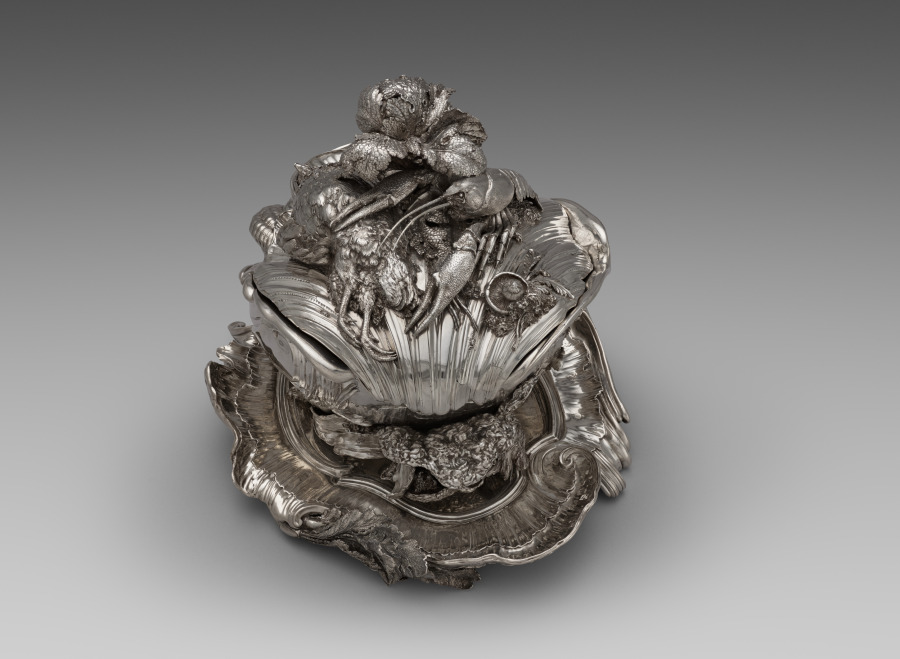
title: Covered Tureen on Stand (Pot-à-oille)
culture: France, Paris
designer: Juste-Aurèle Meissonnier (French, 1695–1750)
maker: Pierre-François Bonnestrenne (French)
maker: Henry Adnet (French, 1745)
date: 1735–38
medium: silver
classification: Silver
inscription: [Maker’s mark of Pierre−François Bonnestrenne, beneath platter; inside tureen (two marks)]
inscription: [Warden's mark for Paris, 1734−1735, beneath platter; inside tureen; inside cover]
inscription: [Charge mark of Hubert Louvet, Paris, 1732-1738, on platter border; beneath platter; beneath tureen; inside cover; inside tureen (two marks)]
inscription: [Discharge mark of Louis Robin mostly used for stamping small work, Paris 1738−1744, on platter border; beneath tureen]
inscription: [Warden's mark for Paris, 1736−1737, on platter border]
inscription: [Possibly British import mark, London, 1925, on platter border]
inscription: [Possibly mark of the British firm Charles & Richard Comyns, on platter border]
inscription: [Discharge of Louis Robin mostly used for stamping gold and silver between 1738 and 1744, beneath tureen; outside cover]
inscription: [Maker’s mark of Henry-Guillaume Adnet, inside cover]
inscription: [Two small undefined marks, inside cover]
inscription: [Under the surface of the platter the engraved signature]: “FAIT-PAR-I-A-MEISSONIER-ARCHITECTTE”; [and the weight] “673=5"; “No. [v] I 50 £ b76Sol”; [and the numbers] “A nº 1”; “A nº2”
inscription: [On tureen lip]: "MEISSONIER"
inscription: [On tureen lip]: “A nº 3”; “A nº2” [in order to place the tureen correctly on the stand]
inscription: [Numbers engraved on the stand, the tureen, and the cover to show how the piece should be assembled]: “A nº 1” [on the base of the tureen; beneath the cover; on the platter], “A nº 2” [on the platter], “A nº 3” [on the exterior rim of the tureen], “A nº4”; “A nº 5” [outside the cover], “A nº 7” [on the border of the platter]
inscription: [Two warden's marks for Paris, 1735-1736, beneath tureen]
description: This tureen exemplifies the French Rococo style, an artistic movement celebrating naturalistic forms that developed in Paris during the early 1700s. In contrast to classical, controlled symmetry, Rococo forms morph, twist, and spill into the space around them. Meissonnier embellished this tureen in a picturesque arrangement of vegetables and creatures, transforming a utilitarian object into a decadent display of wealth and abundance. This masterpiece comes from a set of two tureens commissioned by the English Duke of Kingston during an extended stay in Paris in the 1730s.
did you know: The langoustine, pigeon, and vegetables were cast using real examples giving the silver copies lifelike detail and appearance.